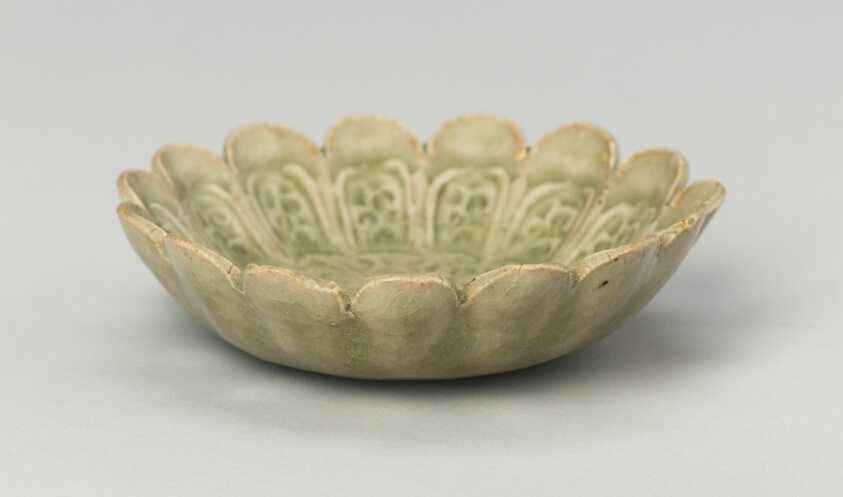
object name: Vessel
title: Scalloped Dish with Stylized Floral Sprays and Sickle-Leaf Scrolls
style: Chinese (culture or style)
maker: China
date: Northern Song (960–1127) or Jin dynasty (1115–1234), 12th/13th century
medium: Yaozhou ware; glazed stoneware with underglaze molded decoration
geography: China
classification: dish (vessel); ceramics; vessel